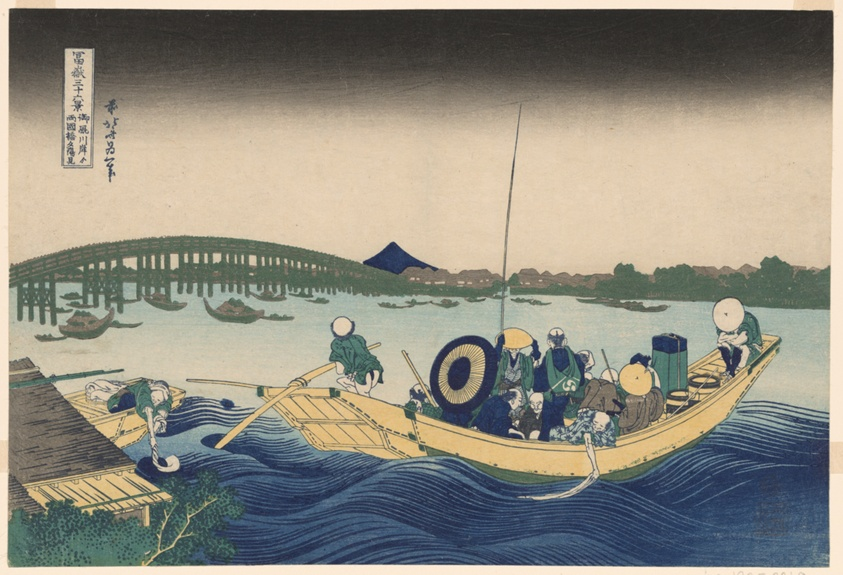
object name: Print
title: Fuji from Ommayagashi with Twilight over Ryogoku Bridge (Ommayagashi yori ryogokubashi sekiyo o miru), from the series "Thirty-six Views of Mount Fuji (Fugaku sanjurokkei)"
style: Japanese (culture or style)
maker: Katsushika Hokusai 葛飾 北斎; Japanese, 1760-1849; Publisher: Hibino Yohachi; Japanese, unknown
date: c. 1830/33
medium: Color woodblock print; oban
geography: Japan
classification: woodblock print; print; asian art